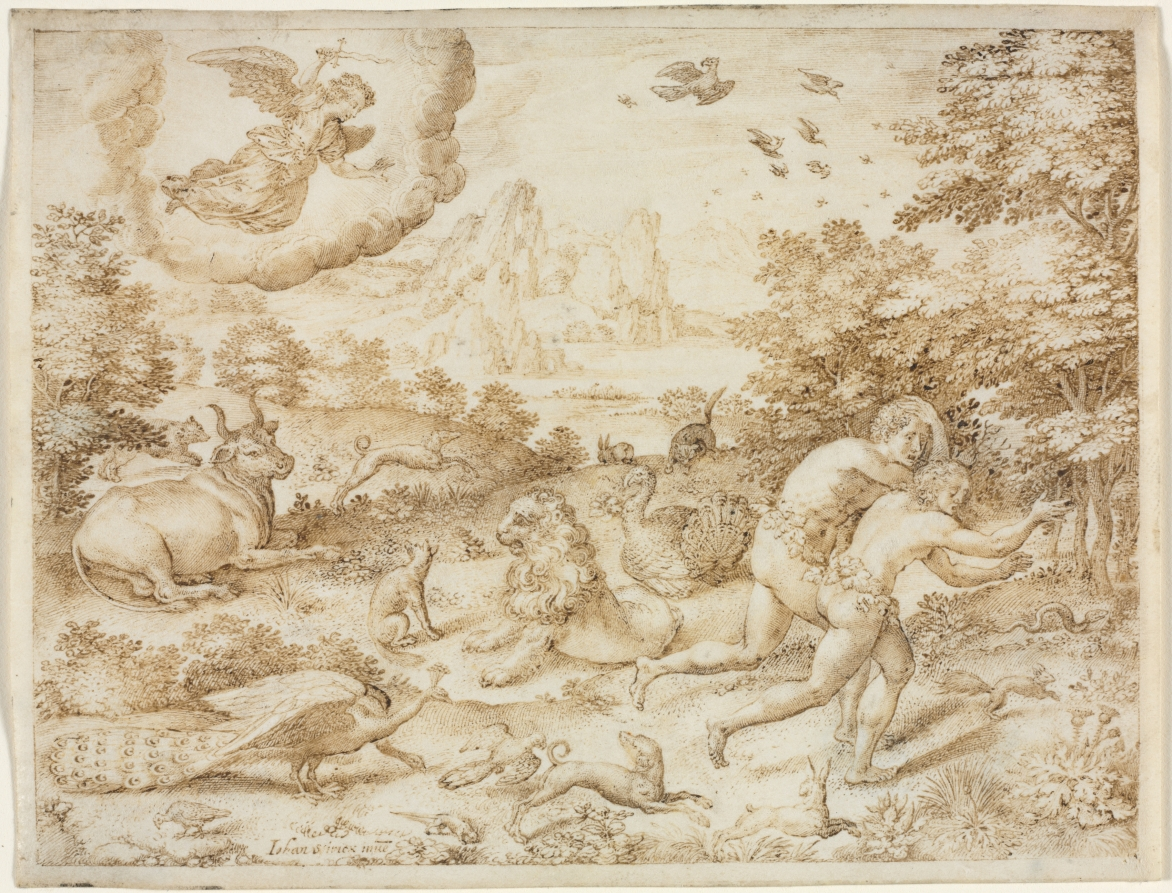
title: The Expulsion from Paradise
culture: Flanders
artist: Jan Wierix (Flemish, c. 1549–after 1615)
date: c. 1606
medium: Pen and brown ink on parchment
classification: Drawing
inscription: signed, lower left, in brown ink: Iohan wiricx inue [abbreviation line over "u" and "e"]; verso, lower left, in graphite: No ["o" with double underlines]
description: Originally this exquisite sheet belonged to a series of 21 drawings by the Antwerp artist Jan Wierix illustrating the creation and early history of man as recounted in Genesis. In this scene, an angel casts Adam and Eve out of paradise for their transgressions. Precious in its delicate pen strokes and careful detail, the drawing describes Eden as a microcosm populated by an array of animals whose tranquility is in the midst of being interrupted by human actions. Pen and ink drawings on vellum such as this were prized by collectors, who valued them as miniature paintings to be displayed in albums and sometimes framed on the wall.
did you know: This artist's version of the Garden of Eden includes a turkey, a bird that was unknown in Europe until the 16th century, when it was imported from the Americas.